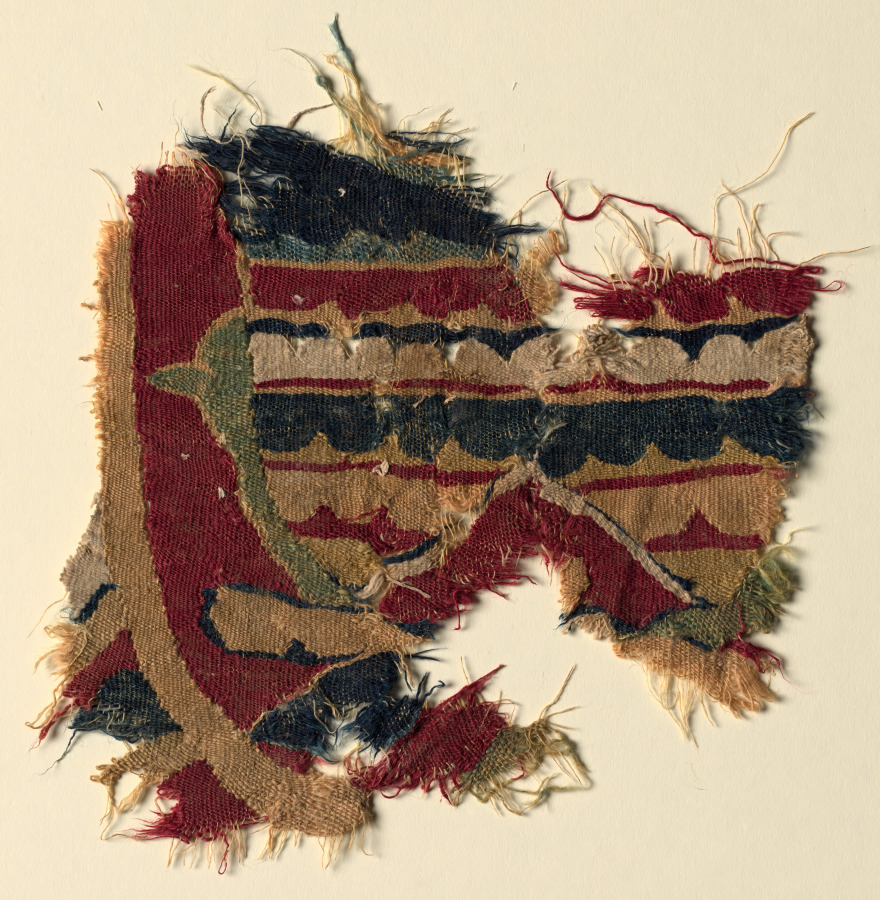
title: Fragment of a Large Hanging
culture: Egypt, Tulunid period, 9th century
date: 800s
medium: tapestry weave: wool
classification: Textile